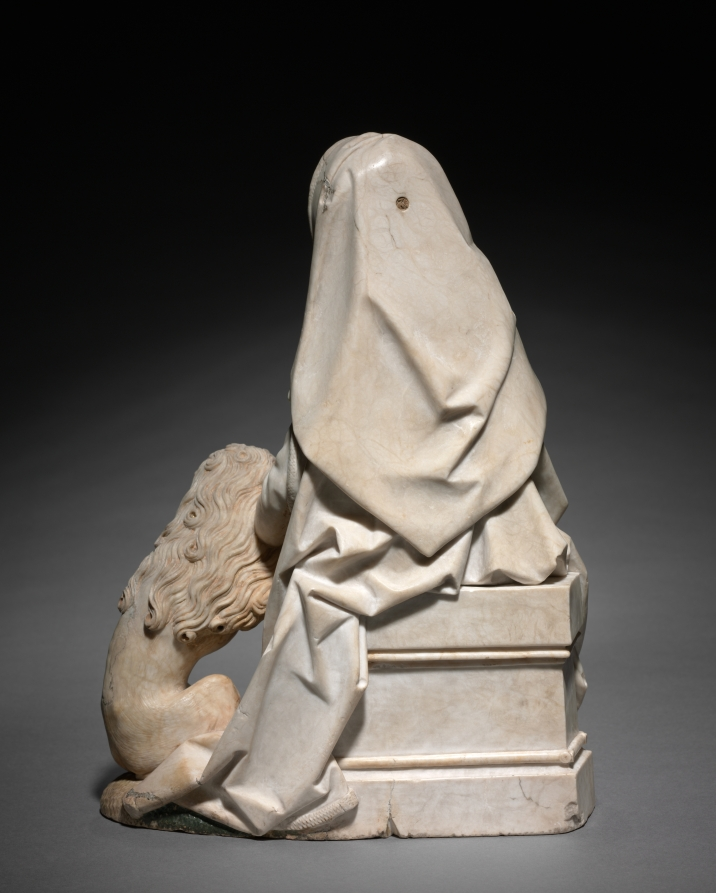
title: Saint Jerome and the Lion (From the former Church of St. Peter in Erfurt)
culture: Germany, Würzburg, late 15th Century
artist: Tilman Riemenschneider (German, active Würzburg, c. 1460–1531)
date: c. 1495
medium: alabaster, traces of polychromy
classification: Sculpture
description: According to legend, Saint Jerome (347–420 bce) lived in the desert, where he removed a thorn from an injured lion. Jerome is venerated in the Catholic Church as a Church Father, an important early author of Christianity. Here, he wears cardinal’s clothing from around 1500. Tilman Riemenschneider focused on Jerome’s relationship with the lion, creating empathy for the wounded animal. The delicacy of the depiction, which may have been partially painted to add highlights, is typical of alabaster, as is its fine polishing. The cord of the cardinal’s hat, missing today, may have been supplemented from another material.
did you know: In the story Saint Jerome encounters a fearsome lion, here depicted as diminutive, gentle, and submissive.